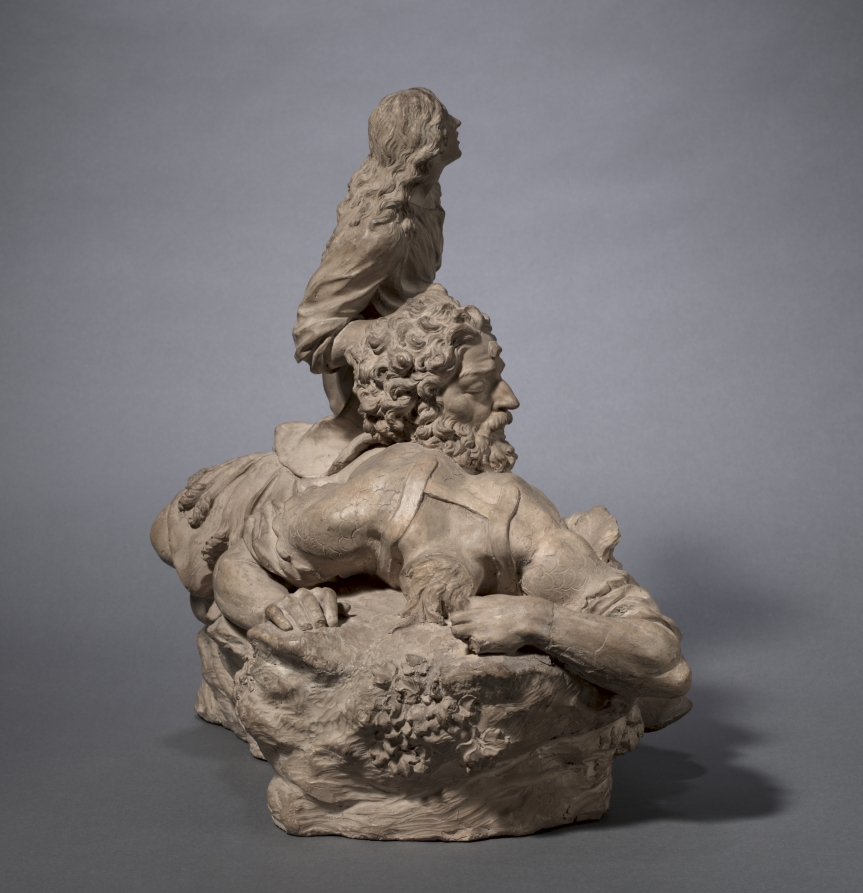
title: David Victorious over Goliath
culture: Italy, Florence, 18th century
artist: Giovanni Battista Foggini (Italian, 1652–1725)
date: 1722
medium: terracotta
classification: Sculpture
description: This terracotta model was used to cast part of a series of bronzes on religious subjects. Foggini depicted David humbly, a compelling contrast to the more traditional Florentine approach of David as a proud victor. The subject of David was especially important because he had long symbolized Florence: the city was often able to overcome its larger rivals, much like David defeated the giant Goliath.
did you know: David was a popular figure in Florentine art and often embodied civic liberty.